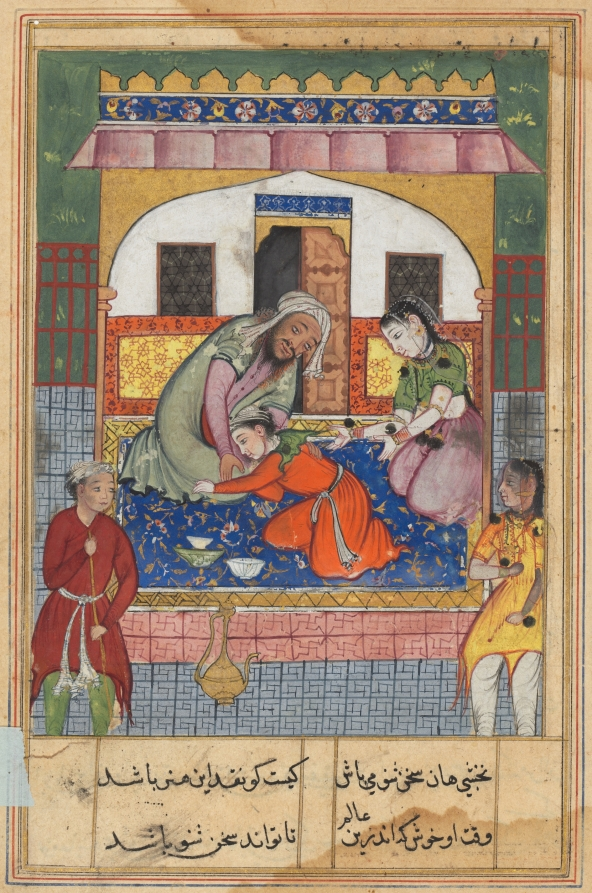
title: Repenting his conduct, ‘Ubaid falls at the feet of his parents, from a Tuti-nama (Tales of a Parrot): Forty-second Night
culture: Mughal India, court of Akbar (reigned 1556–1605)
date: c. 1560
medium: gum tempera, ink, and gold on paper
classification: Painting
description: ‘Ubaid, who was so infatuated with his new wife that he neglected his duties, is embraced by his father, the merchant of Tirmiz, who happily welcomes his repentance. ‘Ubaid has learned a lesson about the importance of familial obedience from a wise, talking parrot and a myna bird.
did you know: A golden ewer and a piece of blue-and-white Chinese porcelain are visible in the scene.